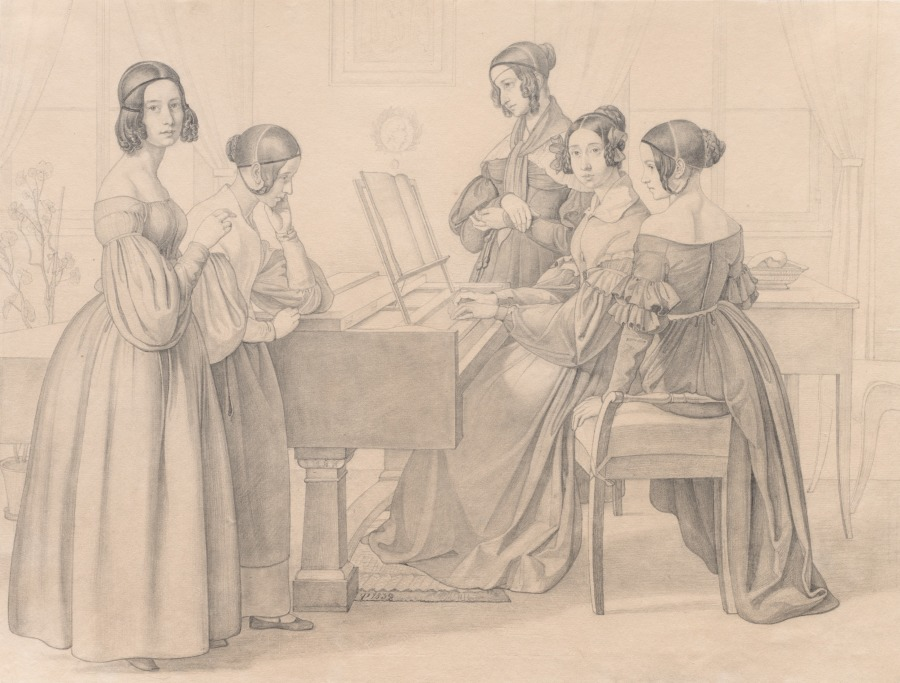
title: Musicale at the Prellers'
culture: Germany, 19th century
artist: Friedrich Preller (German, 1804–1878)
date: 1838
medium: graphite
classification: Drawing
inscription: signed, lower center, in graphite: [artist monogram: FP] 1838 [the 8 changed from a 9]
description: This drawing depicts an afternoon or evening soirée hosted by Preller, a renowned German landscape painter, and his wife. The piano is the focus of the domestic social gathering. Among the young women gathered around the instrument are two sisters, Malvina and Olinda (with the eye patch), daughters of a professor of aesthetics, Fredrich Bouterweck. Olinda studied painting with Preller and was very close to the artist’s family. Preller’s sons called her "aunt Olinda," and she appears in several of Preller’s drawings from the 1830s and ’40s, easily identifiable by the eye patch.